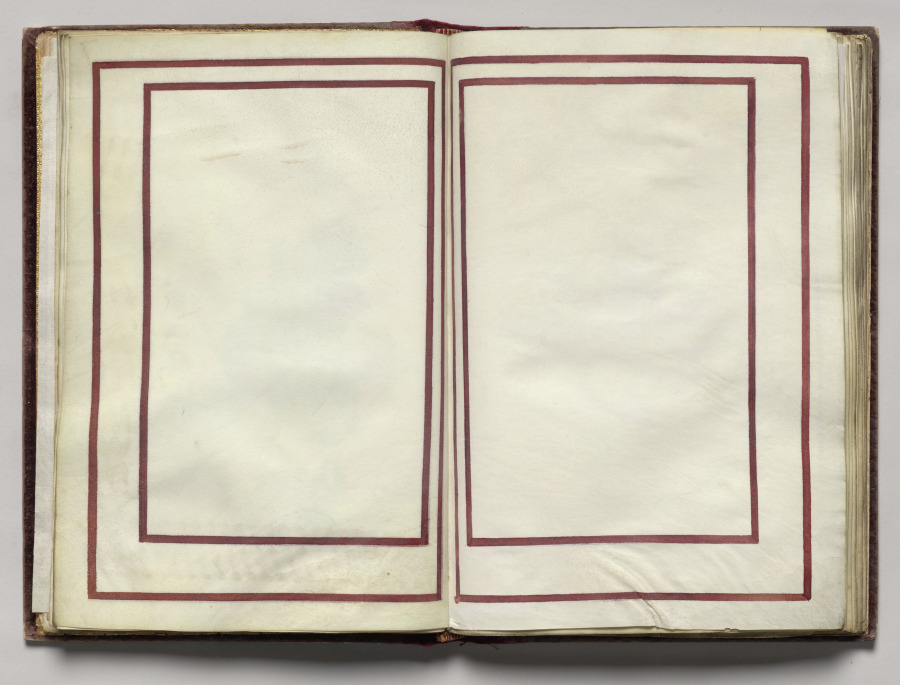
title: Border, folio 11 (verso), from Florilegium (A Book of Flower Studies)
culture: France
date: 1608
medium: watercolor, ink, silver and gold over occasional traces of pencil, on vellum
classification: Bound Volume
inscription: Dated: Poitiers 1608 (on frontispiece) Signed: On frontispiece in black ink, lower right: Van Kuyk Notation on drawing: Frontispiece: in pencil, lower margin: * élève de Van Kessel, peintre flammand (* in pencil also appears in front of Van Kuyk's name).